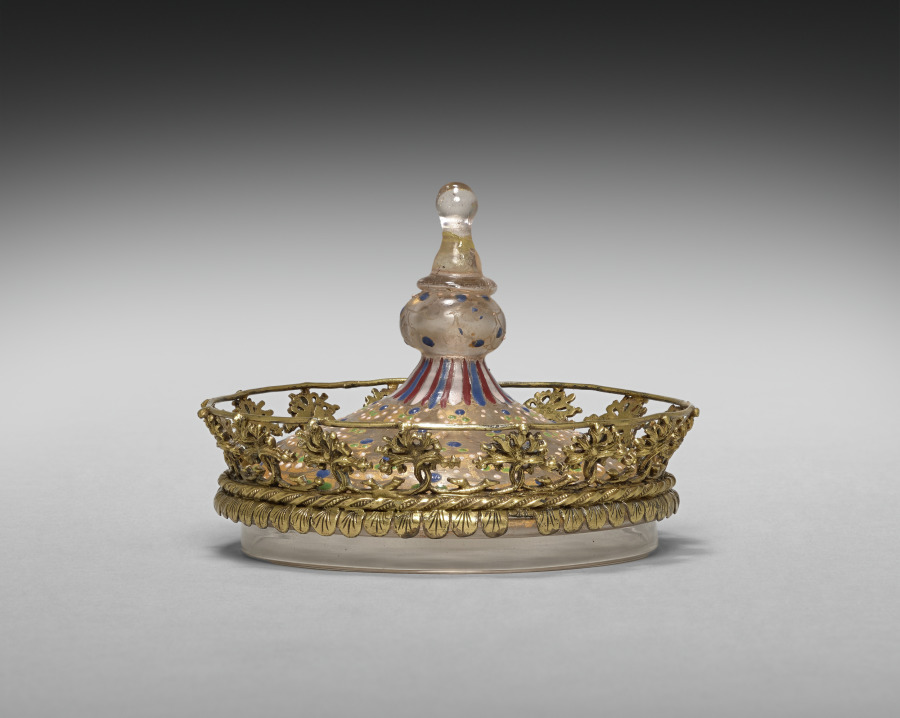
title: Cover for a Beaker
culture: Italy, Venice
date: c. 1490–1500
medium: glass, enameled and gilded, gilt-silver mounts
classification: Glass